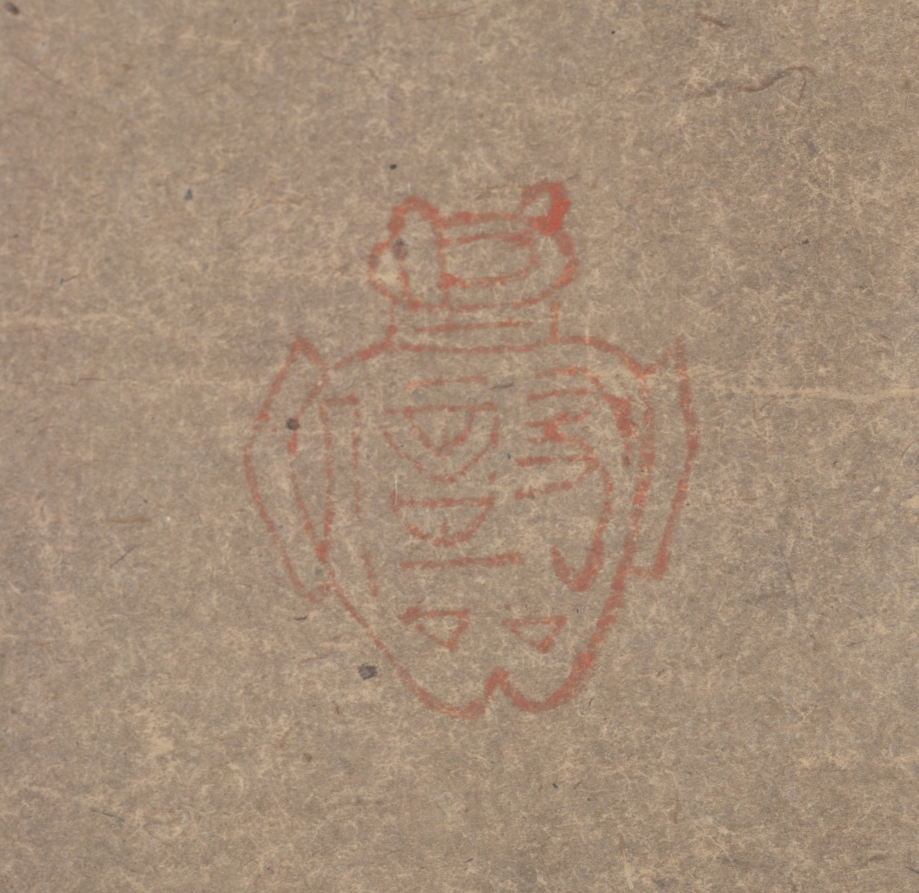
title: Hotei with Daoist Immortals: Hotei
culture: Japan, Edo period (1615–1868)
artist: Kyūseki Tomonobu (Japanese, 1653–1721)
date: late 1600s-early 1700s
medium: triptych of hanging scrolls: ink on paper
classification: Painting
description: Hotei was a Chan (Japanese: Zen) monk living in China during the 900s who, in the 1300s, became a legendary figure in Japan. At that time a popular cult praising him sprang up, extending beyond Zen to other religious communities. This rare triptych embraces a central Zen icon with flanking Daoist images, thereby suggesting the compatibility-rather than the exclusivity-of these two creeds. Hotei also enjoys popularity in Japan as a kind of genre, or folk figure, which explains his mirthful expression in Japanese paintings. The Daoist figures in contrast appear eccentric and foreign-looking, in keeping with Daoist lore. When these paintings came to the museum their appearance was compromised by poor quality textile mountings, and cracked paper surfaces deserving of restoration. The fact that these scrolls constituted an integral set that properly had to be shown as a unit heightened the need to stabilize their condition and improve their presentation for museum visitors. A complete remounting of each scroll occurred following the cleaning of the paper surfaces and the repair of the lifting surface areas. No inpainting was done, thereby preserving the original ink values and brushstrokes.